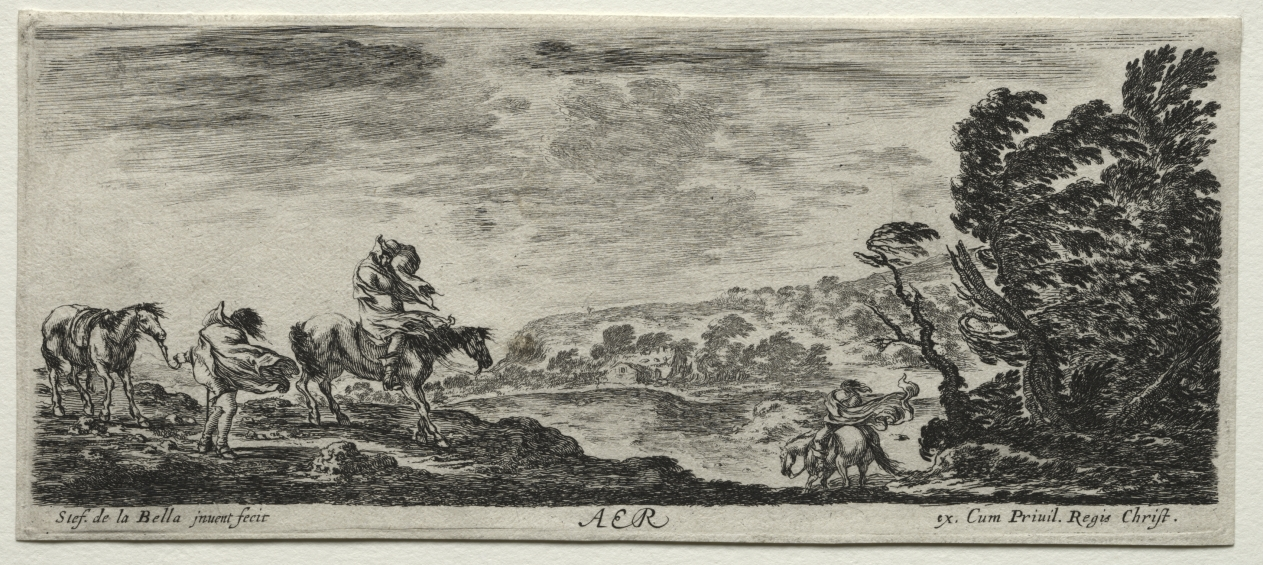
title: The Four Elements: Aer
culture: Italy, 17th century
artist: Stefano Della Bella (Italian, 1610–1664)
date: c. 1648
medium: etching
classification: Print